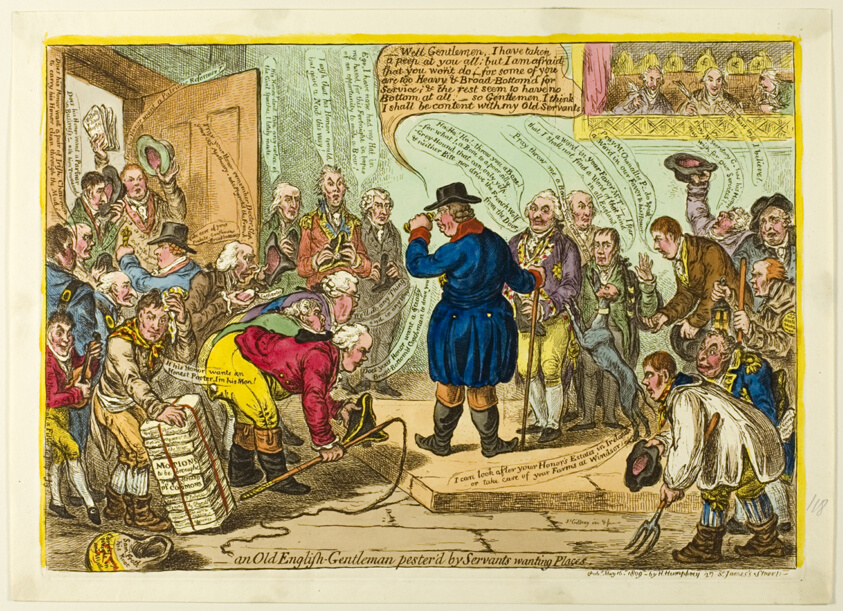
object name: Print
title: Old English-Gentleman Pester'd by Servants Wanting Places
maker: James Gillray (English, 1756-1815); published by Hannah Humphrey (English, c. 1745-1818)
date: published May 16, 1809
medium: Hand-colored etching on paper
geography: England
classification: etching; print; prints and drawing